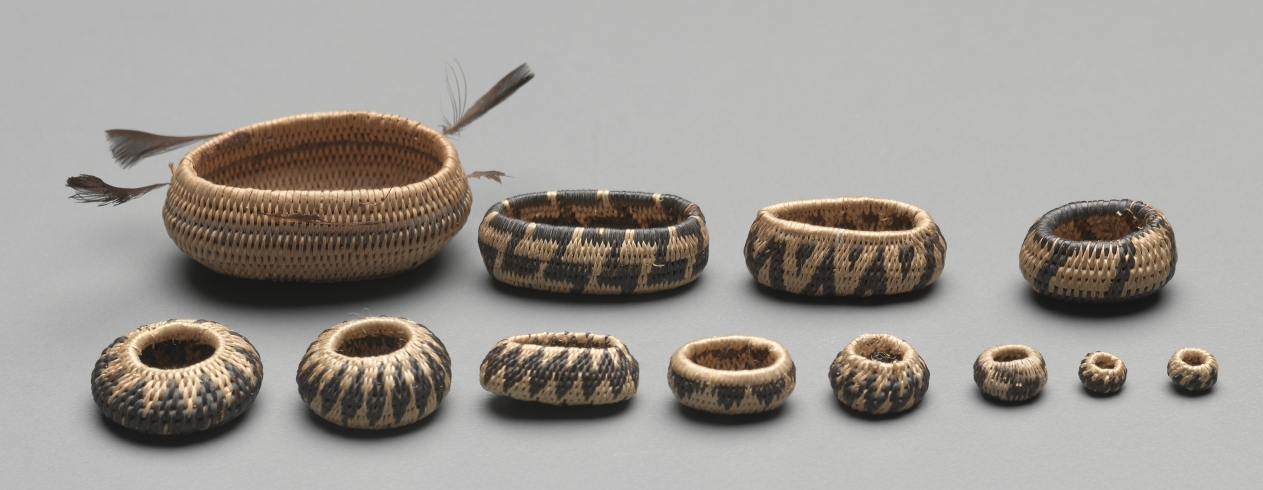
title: Miniature Oval Basket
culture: California, Pomo, 20th century (?)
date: Early 1900s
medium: coiled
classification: Basketry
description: Miniature baskets were made to demonstrate the basket-maker’s virtuoso skill, and these tiny marvels seem to be no exception—the smallest are just a few millimeters wide but still patterned. For such fine work, dexterity was required as much for preparation of materials as for weaving.